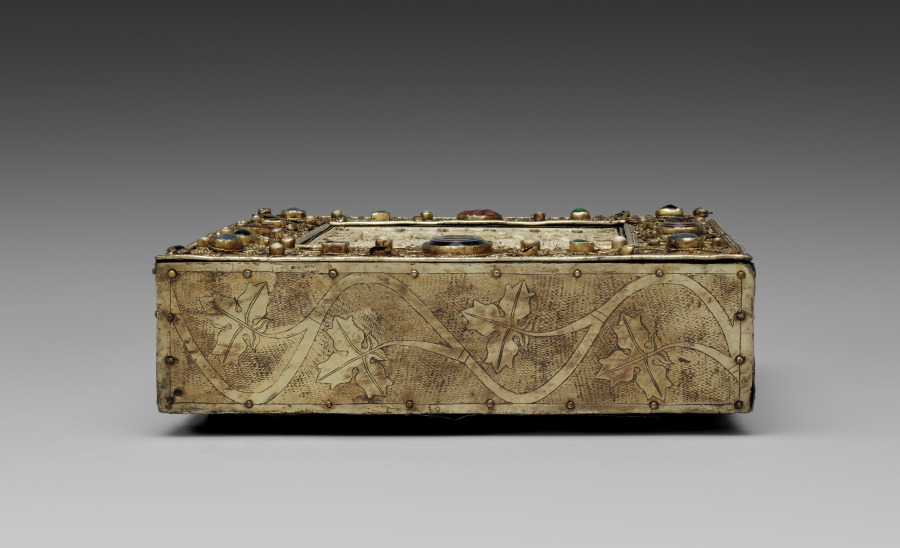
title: Book-Shaped Reliquary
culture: Ivory: Ottonian, Lorrain; Frame: Germany, Lower Saxony, Brunswick, Gothic period, 14th century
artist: circle of The Master of the Registrum Gregorii (German, active c. 972–1000)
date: c. 1000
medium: ivory, silver: gilded, pearls, rubies, emeralds, crystals, onyx, carnelian, oak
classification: Metalwork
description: This sumptuous object closely resembles a deluxe medieval book cover in both form and decoration. It was likely commissioned by Otto the Mild, Duke of Saxony (reigned 1318–48) around 1340. It was made to contain a leaf from each gospel and relics of the 11,000 virgins and 4 other saints. These relics were originally kept in a cavity behind the delicately carved ivory plaque depicting scenes from the Wedding at Cana (John 2:1–11). The story of Christ's first miracle is presented in three scenes. In the upper left, the Virgin informs Christ and his apostles of the lack of wine at the wedding banquet. On the right, the groom, his bride, and their guests sit behind a table, two servants offering them goblets. In the lower register, two attendants pour water into the first of six storage vessels while Christ addresses his mother and the bride. The back of the reliquary shows the engraved figures of the main patron saints of Brunswick Cathedral: placed within a delicate Gothic architectural frame, Saint John the Baptist is flanked by Saints Blaise and Thomas Becket.